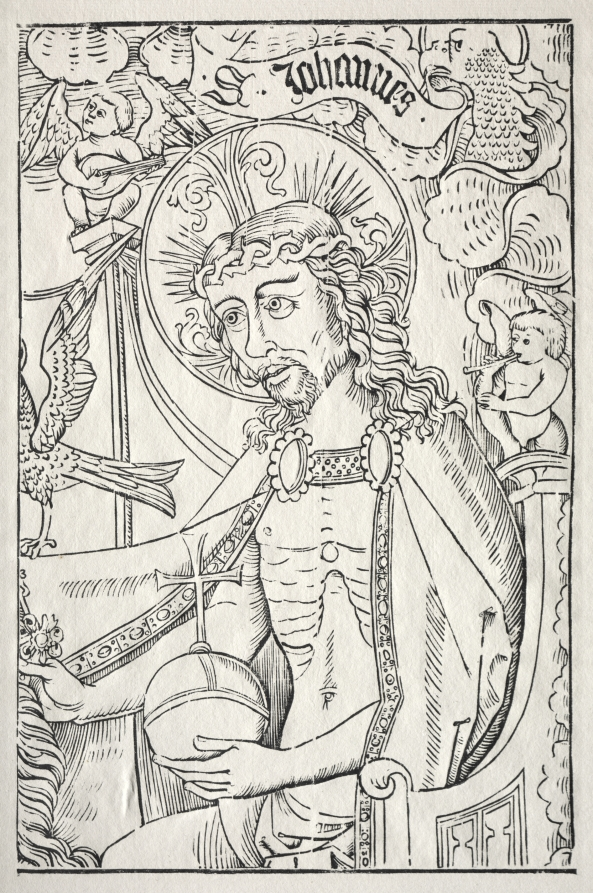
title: Christus im Halbfigur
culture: Germany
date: c. 1480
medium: woodcut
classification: Print